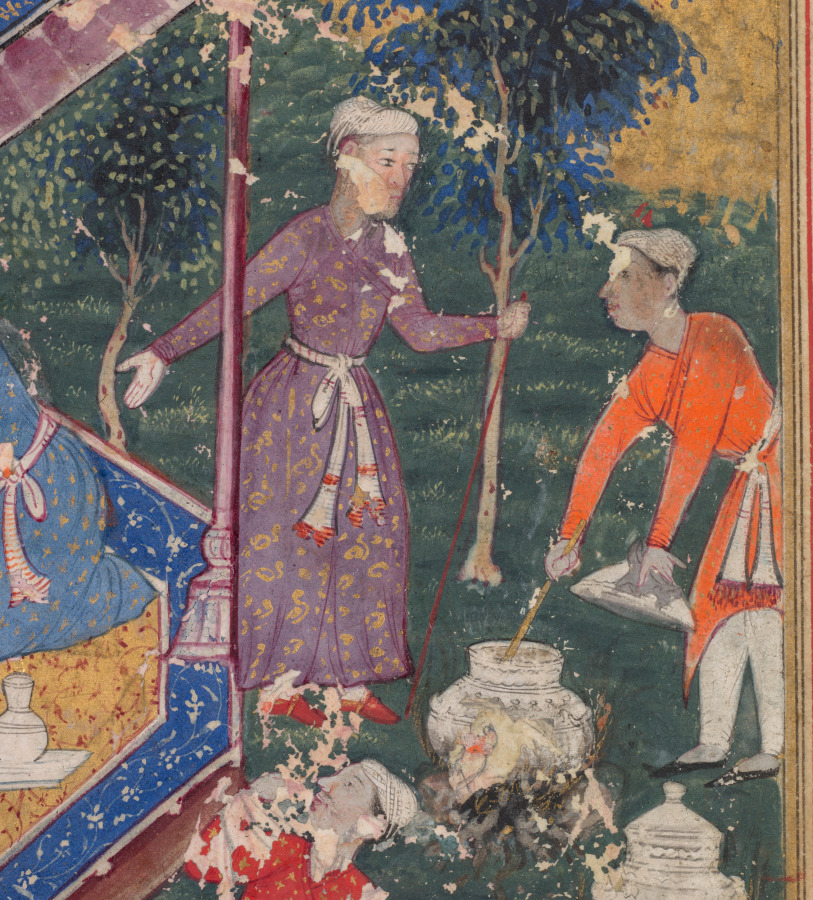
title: The wounded monkey bites the hand of the prince, his chessmate, in the presence of guests, from a Tuti-nama (Tales of a Parrot): Fifth Night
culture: Mughal India, court of Akbar (reigned 1556–1605)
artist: Dasavanta (Indian, d. 1584)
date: c. 1560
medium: gum tempera, ink, and gold on paper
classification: Painting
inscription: 'amal daswant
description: This painting depicts a scene from the cautionary tale the mother parrot tells her young to warn them that interspecies friendships, like theirs with the fox cubs, are a bad idea. She tells them that there once was a monkey who could play chess, and he enjoyed many games with a prince. When the prince invited dignitaries for a party, the monkey made a bad joke, the prince slapped him, and the monkey bit him in return. At the left, food is prepared as the guests look on in astonishment. An inscription at the bottom of the page names the artist, who went on to become one of the most celebrated Indian masters at the Mughal court.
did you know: Young master artist Dasavanta put a layer of cool blue color under his painting.